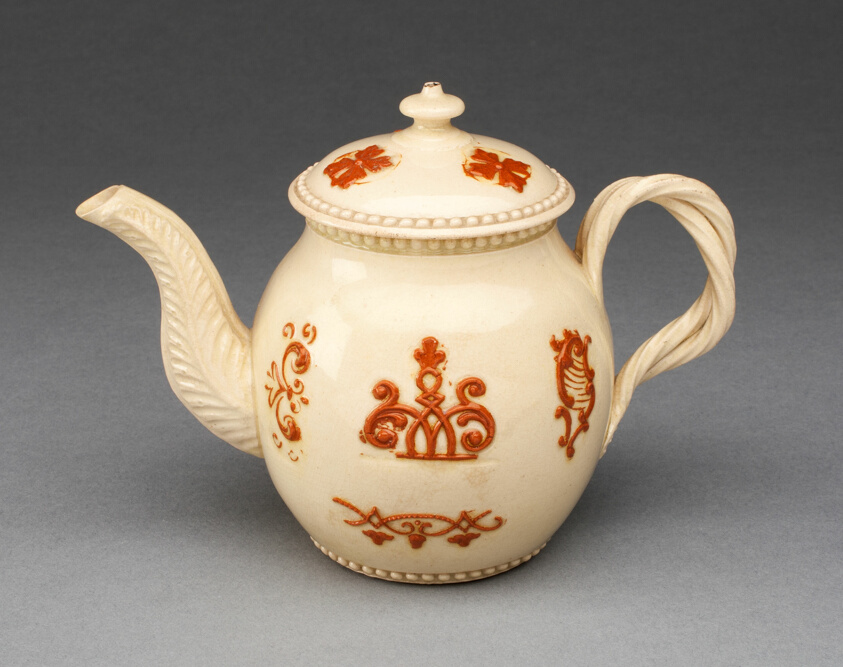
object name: Ceramics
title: Teapot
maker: Staffordshire, England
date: c. 1750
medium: Lead-glazed earthenware (creamware)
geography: Staffordshire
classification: teapot; creamware; lead-glazed earthenware; european decorative arts; ceramics; earthenware